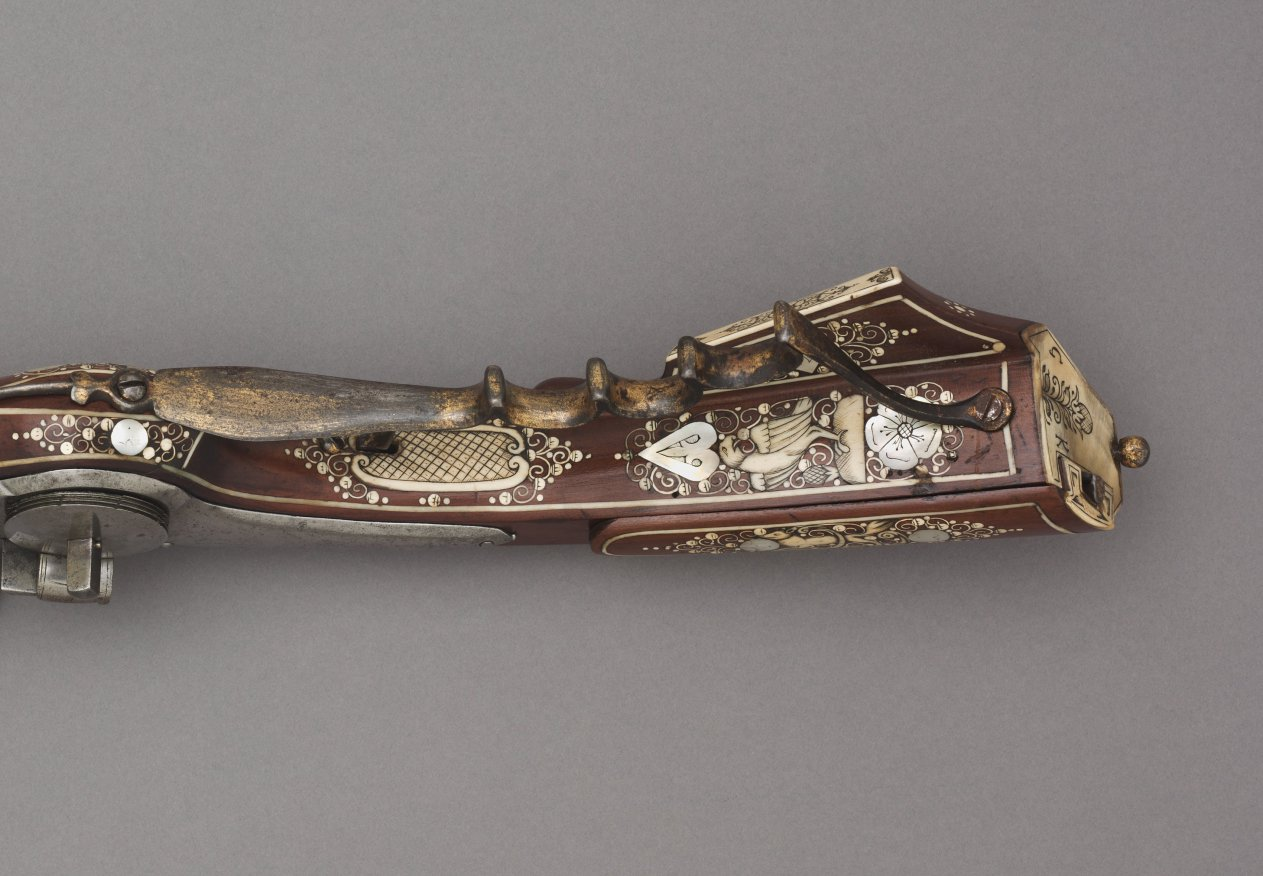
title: Wheel-lock Petronel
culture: Silesia (Southwestern Poland), Teschen, 17th century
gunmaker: Georg Kurland (Polish)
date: c. 1630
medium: steel, gilding, and wood inlaid with elk horn, ivory, and mother-of-pearl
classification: Arms and Armor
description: A petronel was a type of long pistol made with a wheel-lock ignition. Despite its length, the petronel was fired at the wrist like a pistol and not at the shoulder like a rifle. They were generally made in pairs during the early 1600s. Civilian versions were elaborately decorated for aristocratic clients.